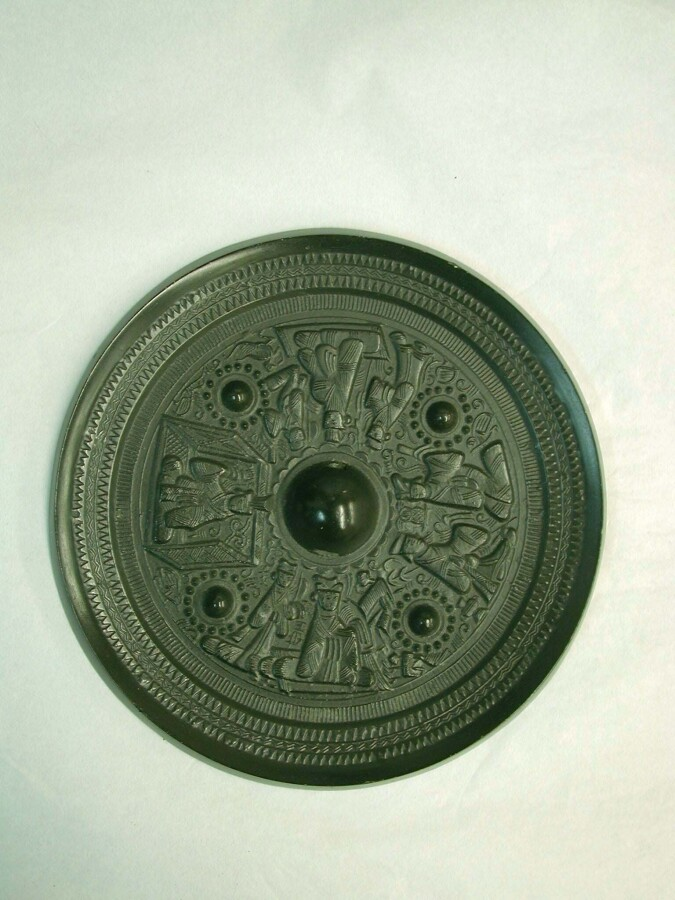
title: Mirror with Deities and Kings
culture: China, Eastern Han dynasty (25–220 CE)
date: 100s CE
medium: bronze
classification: Metalwork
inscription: Queen Mother; King Father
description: Decorated with historic figures from the former states of Wu and Yue, this mirror illustrates the rivalry between the states of Wu (around the Lake Tai basin) and Yue (around Hangzhou Bay) that eventually resulted in the defeat of Wu in 473 BCE. Its downfall became a story retold during the Han dynasty on mirrors from the Shaoxing era. During the relatively peaceful Han dynasty, the number of bronze mirrors used in burials and as gifts increased, as less metal was used for weaponry. Previously known for sword making and having rich metal resources, places like Shaoxing in Zhejiang province became centers of mirror production.